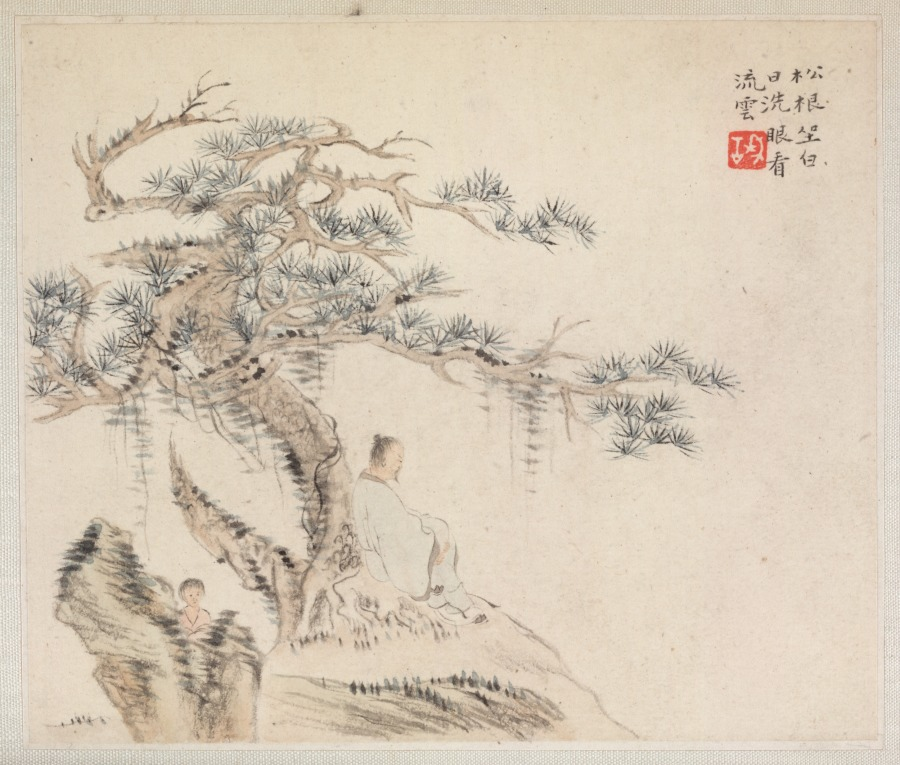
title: Album of Landscape Painting Illustrating Old Poems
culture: China, Qing dynasty (1644–1911)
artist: Hua Yan (Chinese, 1682–c. 1765)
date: 1745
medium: Album of twelve leaves; ink and light color on paper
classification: Painting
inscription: 新羅山人畫冊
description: Hua Yan is one of the Eight Eccentrics of Yangzhou, who rejected orthodox ideas about painting.